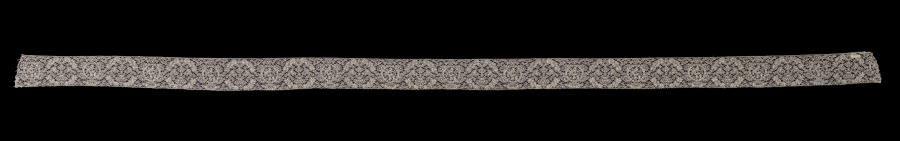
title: Lace Edging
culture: Belgium, Binche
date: 1700s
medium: Linen: bobbin lace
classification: Lace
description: The design of this piece of lace is similar to three other pieces of lace in CMA's collection—1945.86–88.